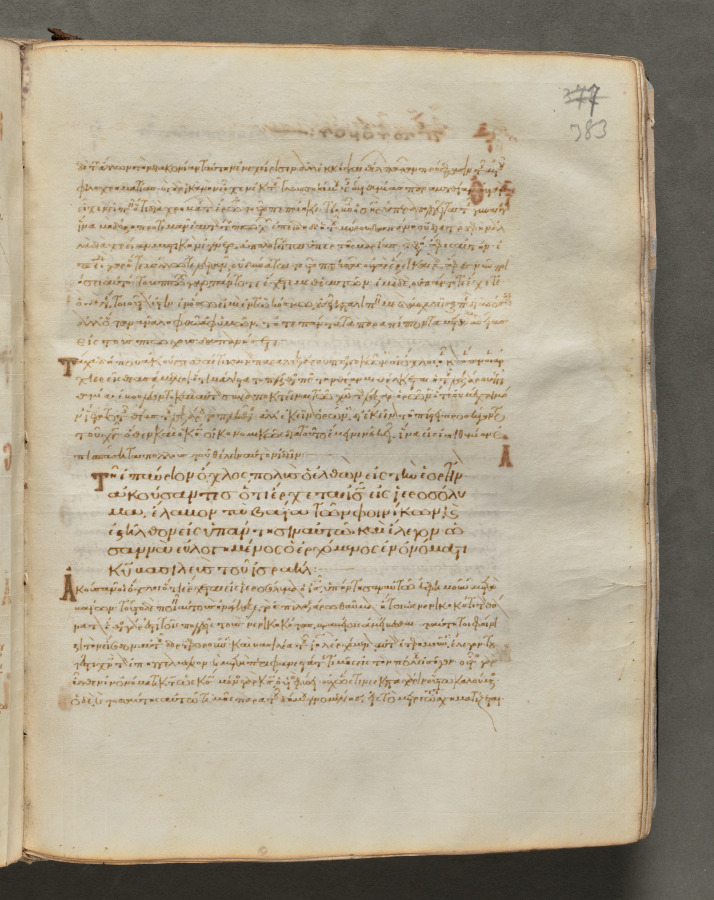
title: Text, folio 383 (recto), from a Gospel Book with Commentaries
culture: Byzantium, Constantinople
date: c. 1000–1100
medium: ink, tempera, and gold on vellum; leather binding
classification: Bound Volume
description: Each of the four gospels in this book opens on a page with brilliantly illuminated borders depicting the author of the text as well as birds—principally peacocks, symbols of the immortality of the soul—and fountains, representing the fountain of life and the salvation of the soul. This volume consists of 428 leaves with texts in Greek. Its level of sophistication suggests that it was probably written and decorated in a monastery in Constantinople.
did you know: Gospel books were carried in procession through Byzantine churches.